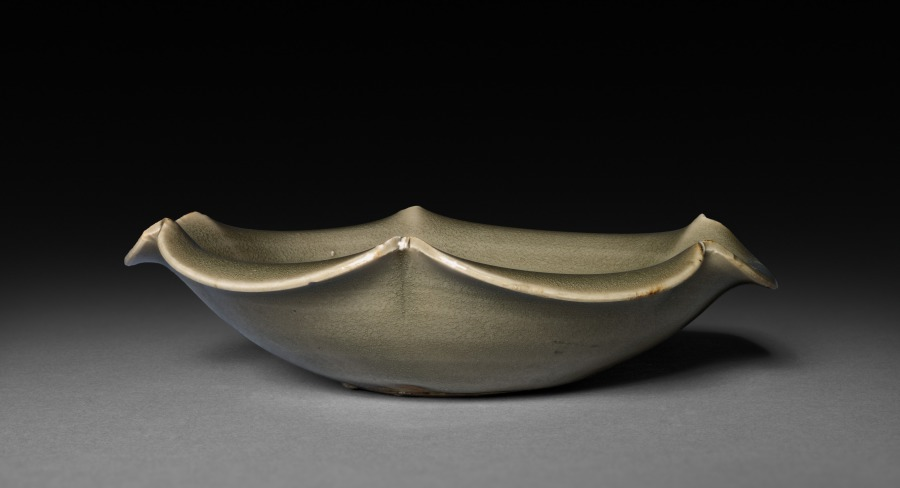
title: Foliated Saucer: Yaozhou Ware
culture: China, Shaanxi province, Northern Song dynasty (960-1127)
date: late 1000s-early 1100s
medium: glazed porcelain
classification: Ceramic